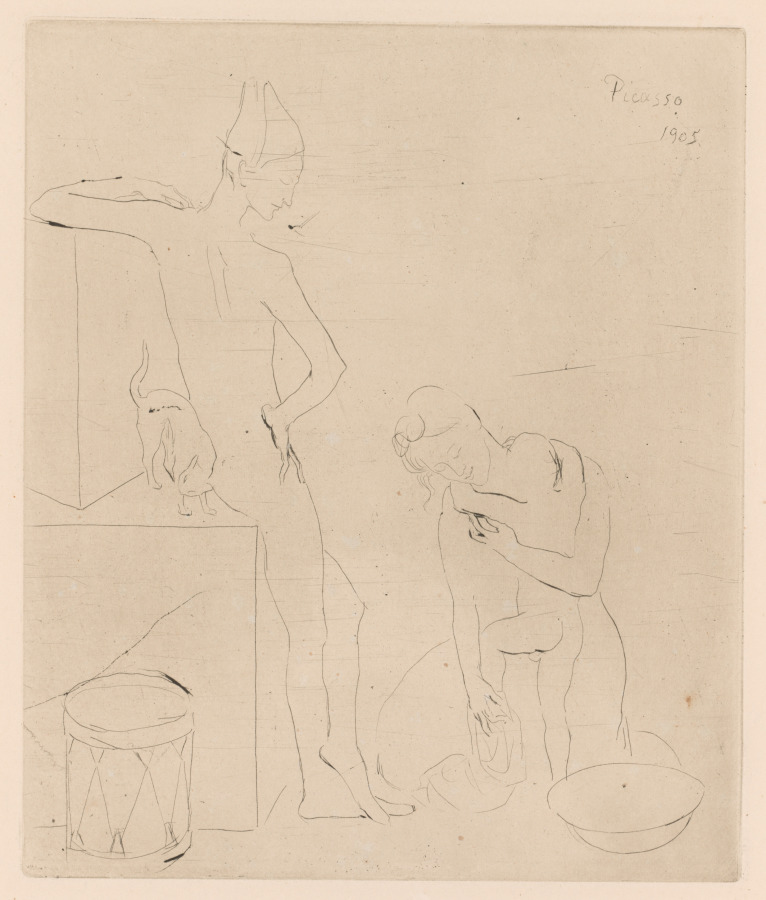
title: The Bath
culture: Spain, 20th century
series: The Saltimbanques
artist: Pablo Picasso (Spanish, 1881–1973)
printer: Louis Fort (French, active 1800s–1900s)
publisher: Ambroise Vollard (French, 1867–1939)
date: 1905, printed 1913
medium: drypoint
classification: Print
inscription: Signed, upper right, in plate: Picasso / 1905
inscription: Watermark: VAN GELDER ZONEN